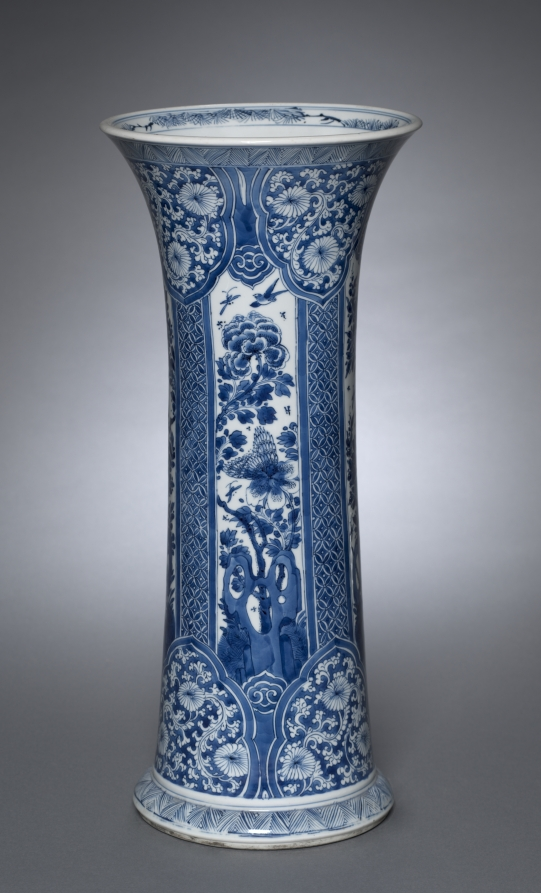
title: Vase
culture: China, Jiangxi province, Jingdezhen kilns, Qing dynasty (1644–1911), Kangxi reign (1662–1722)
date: 1662–1722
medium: porcelain with underglaze blue decoration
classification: Ceramic